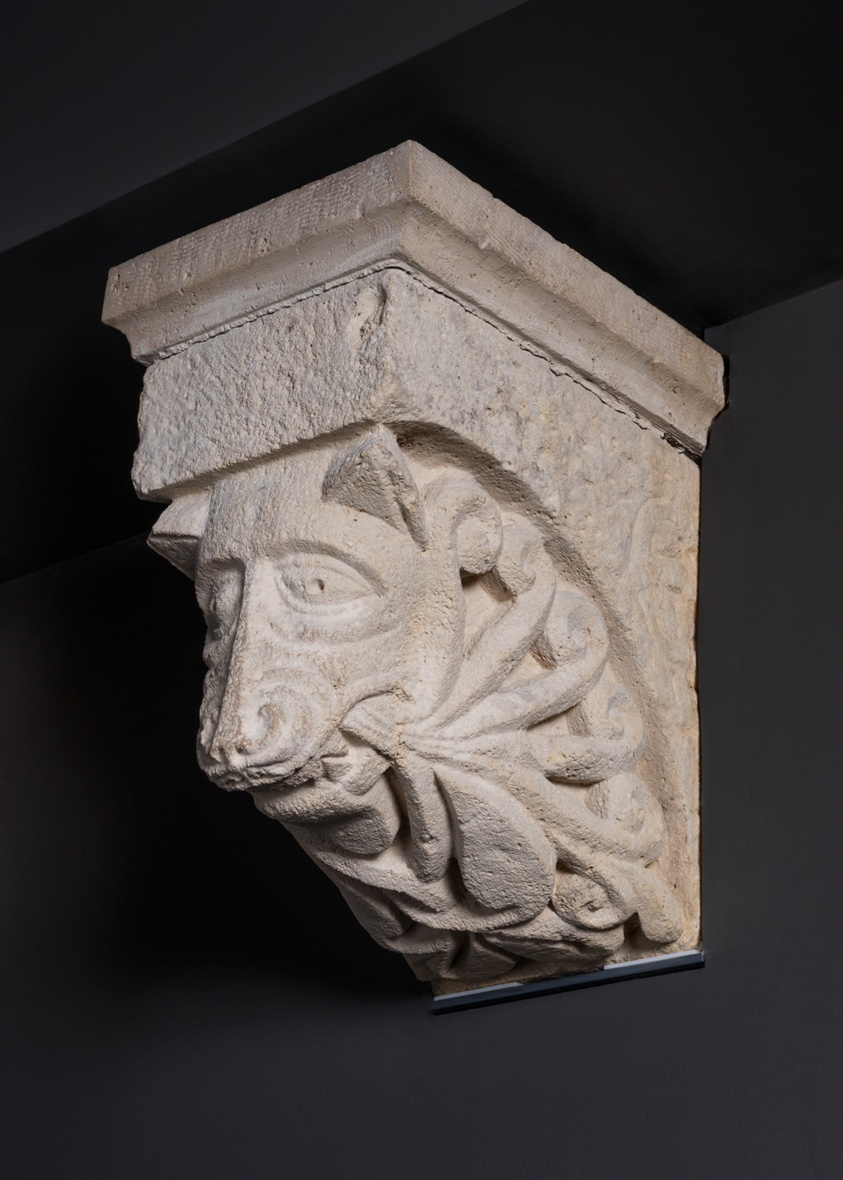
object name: Sculpture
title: Corbel with Animal Mask with Whisker-like Foliate from the Monastery Church of Notre-Dame-de-la-Grande-Sauve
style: medieval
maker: French; Aquitaine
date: 1150/1200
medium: Limestone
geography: France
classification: sculpture; architectural detail; architectural fragment; architecture; fragment; france; french; limestone; sculpture/stone; stone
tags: corbel, animals, architechture, architectural, architectural detail, architectural fragment, architectural fragments, architecture, architecture, masks